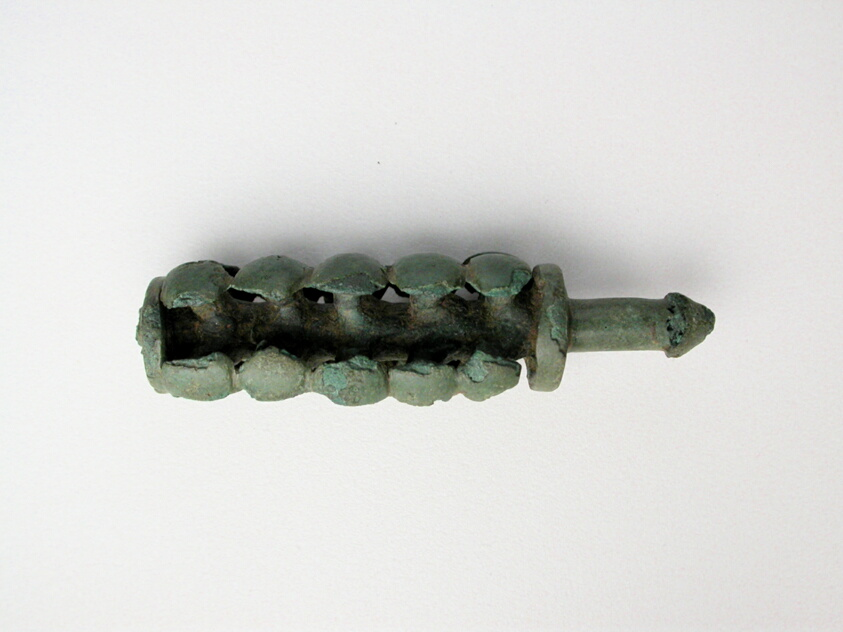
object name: Decorative Arts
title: Finial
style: geometric, ancient, greek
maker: Greek; Thessaly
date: Geometric Period (800–600 BCE)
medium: Bronze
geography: Thessalía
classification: votive offering; ex-voto; decorative arts